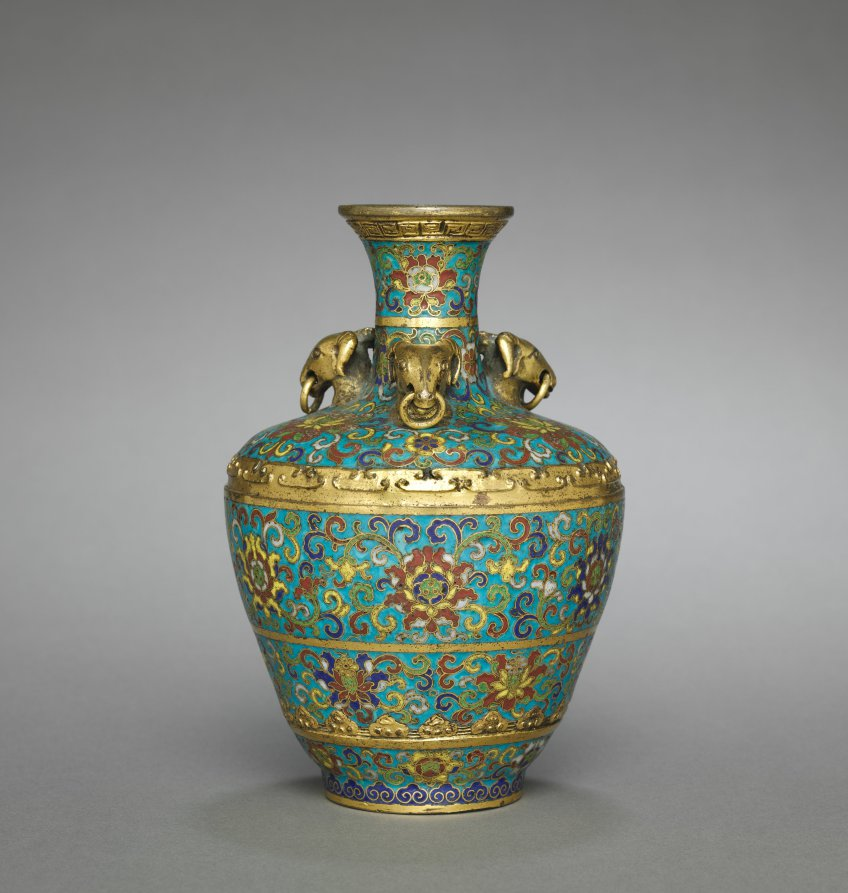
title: Vase with Three Rams' Heads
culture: China, Jiangxi province, Jingdezhen, Qing dynasty (1644-1911), Qianlong mark and reign (1736-1795)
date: 1736–1795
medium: cloisonné enamel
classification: Enamel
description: In cloisonné enameling, the decorative patterns are outlined by soldering metal wires (usually copper) to a metal base, creating a network of cells, or cloisons, to be filled with powdered enamels. After firing, the enamels are polished to create a smooth surface level with the cloisons. The exposed metal surfaces are gilt.